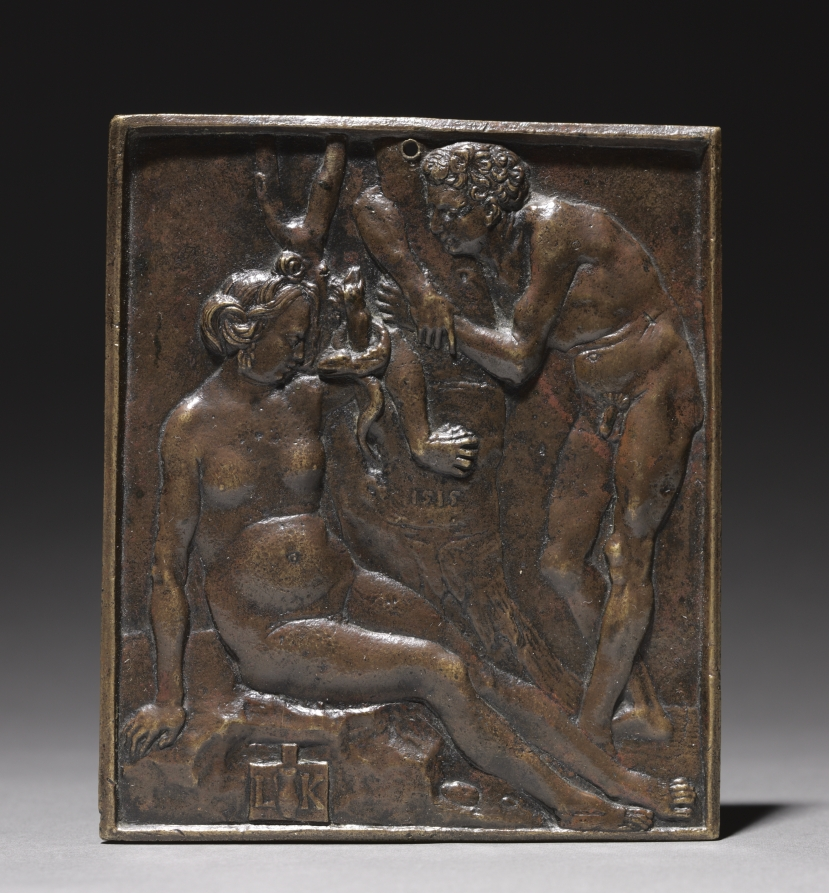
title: Adam and Eve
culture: Germany, Nuremberg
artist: Ludwig Krug (German, 1490–1532)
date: 1518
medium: bronze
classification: Sculpture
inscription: in relief on a plaque near lower edge: "L K" with a jug in between the letters; in relief on the tree trunk: "1515" (for the model); in relief on the reverse: "1518" (for this cast).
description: The present plaquette is the only signed and dated work in bronze by Ludwig Krug. The plaquette exists in two examples, the earlier of which was cast only with the date "1515" (the date of the model) on the obverse side. This slightly later plaquette bears the date "1515" on the front side, but also bears the actual casting date of "1518" on the reverse.